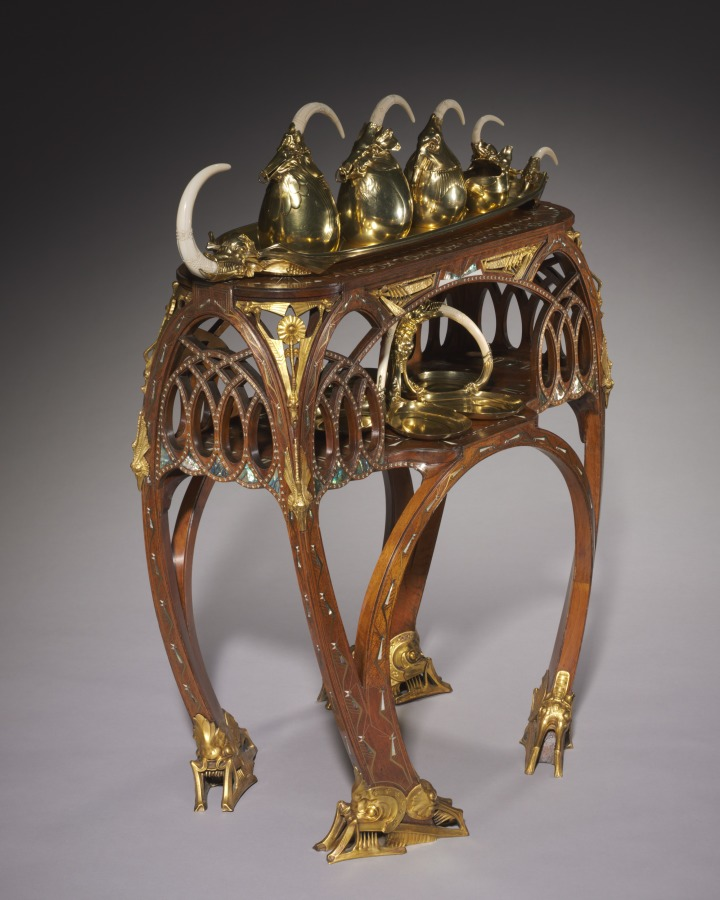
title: Tea Table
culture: France, Paris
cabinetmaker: Carlo Bugatti (Italian, 1856–1940)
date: c. 1907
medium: inlaid wood (mahogany?), cast and gilded bronze mounts, inlays of ivory or bone, metal, and mother-of-pearl (marine mussels or pearl oysters)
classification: Furniture and woodwork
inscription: signed in ligature in white metal inlay on central shelf: Bugatti.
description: Luxurious materials might catch the eye first, but a closer look reveals the imaginary creatures that adorn the surface of this table. Featuring elaborate arches, a favorite motif that appeared throughout Bugatti's furniture, this fantastical imagery is a window into the designer's expressive imagination.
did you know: Carlo Bugatti's sons achieved illustrious careers of their own. Rembrandt Bugatti (1884-1916) became a celebrated sculptor, and Ettore Bugatti (1881-1947) manufactured luxurious automobiles and racing cars.